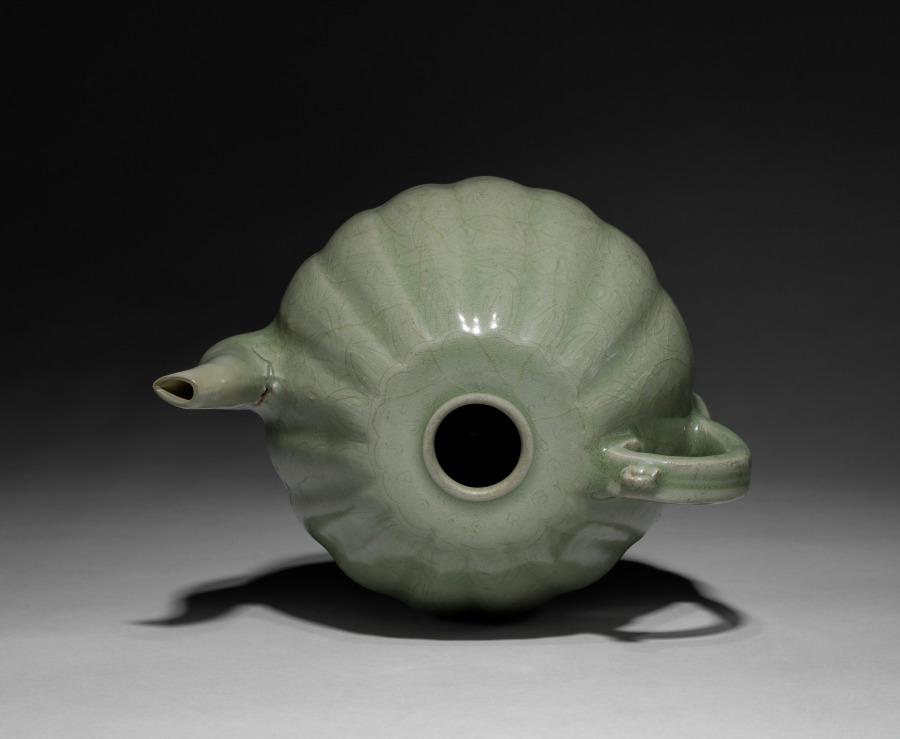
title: Wine Pot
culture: Korea, Goryeo dynasty (918–1392)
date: 918–1392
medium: pottery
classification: Ceramic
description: As early as the seventh century, the practice of drinking tea and wine became an important part of elite culture in Korea. Elites of the Goryeo period commissioned a variety of types of utensils and vessels including this elegant pot, not only to make their drinking experience more exciting, but also to show their appreciation of nature.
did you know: Originally the lid was not coupled with this pot.